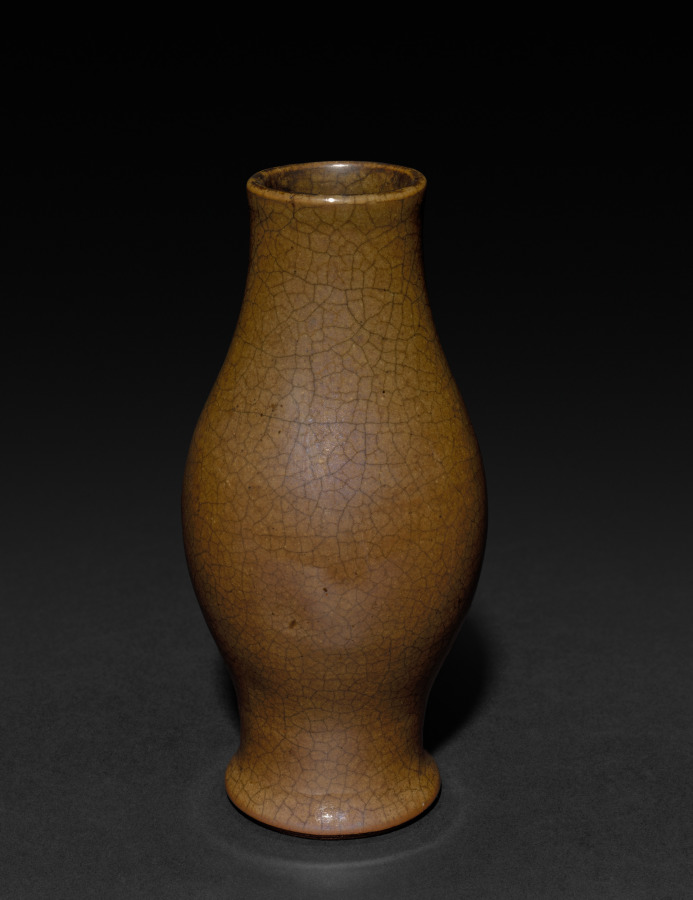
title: Vase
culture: China, Qing dynasty (1644-1911), Kangxi reign (1661-1722)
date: 1662–1722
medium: porcelain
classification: Ceramic